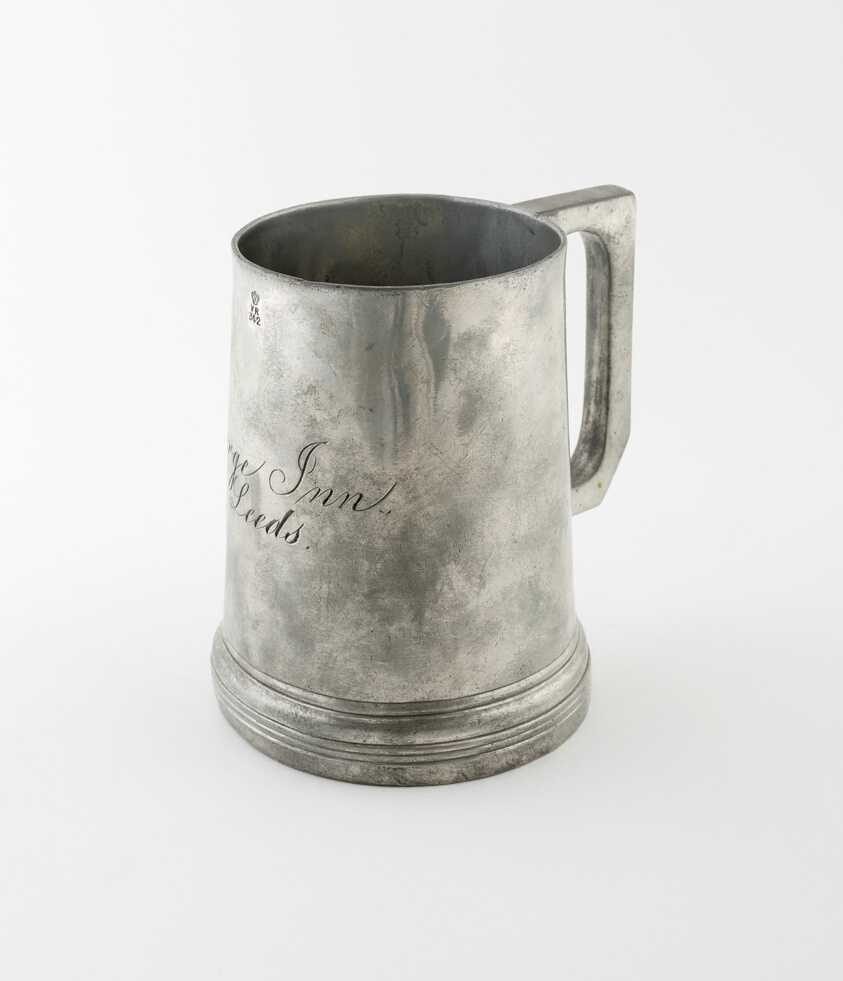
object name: Metalwork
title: Pint Mug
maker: England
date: c. 1840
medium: Pewter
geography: England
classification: pewter; metalwork; european decorative arts